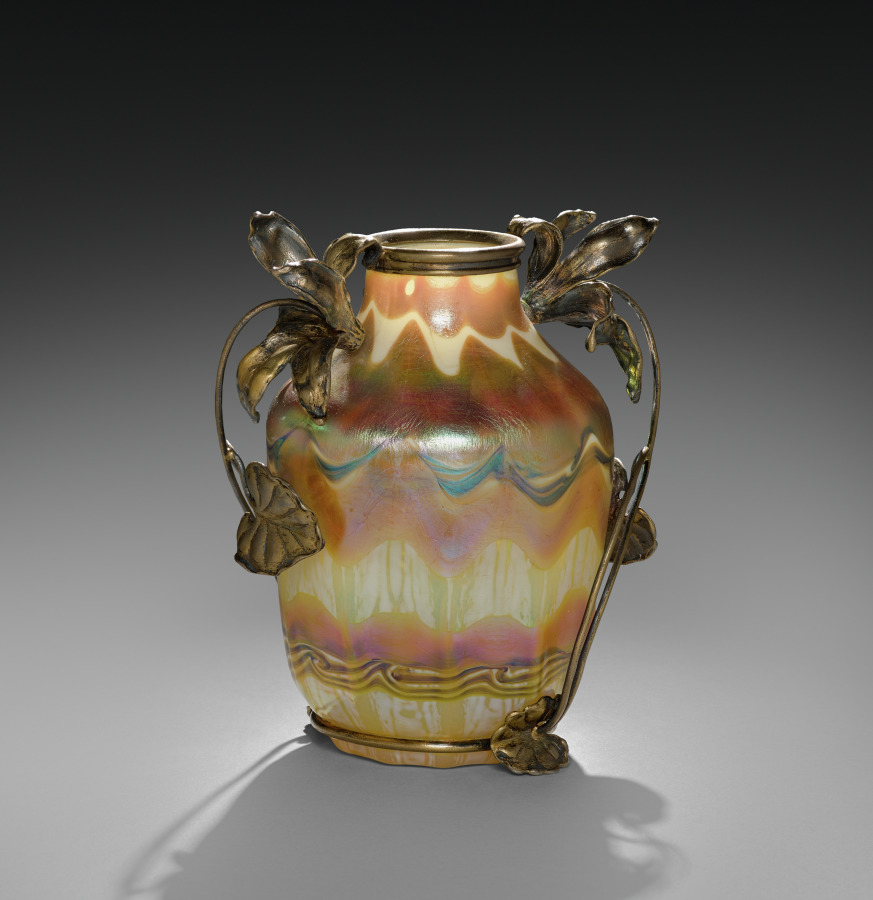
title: Vase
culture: America, New York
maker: Tiffany Glass & Decorating Company (America, New York, 1892–1902)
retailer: Siegfried Bing (German, active in France, 1838–1905)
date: c. 1900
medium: Favrile glass, silver mount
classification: Glass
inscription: Louis C. Tiffany o10301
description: This small vase is made of Louis Comfort Tiffany's signature Favrile glass. Early on when Tiffany began collaborating with glass artists on new types of production, his aesthetic ambitions were realized in the development of Favrile glass, deliberately named to sound French, expensive, and “handmade.” Largely through Tiffany's marketing ability, Favrile glass became America’s greatest contribution to the Art Nouveau style. His works were exhibited at international expositions; galleries in major European cities, where his creations were bought by many museums; and in his store in Manhattan, known as the Tiffany Glass and Decorating Co., later Tiffany Studios. Along with the many shapes and sizes of his decorative vases, Tiffany used Favrile glass in mosaic panels, stained glass windows, and his artistic line of table and floor lamps.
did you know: This vase has French mounts indicating that it was likely sold by Louis Comfort Tiffany's agent in Paris, Siegfried Bing, who helped popularize Tiffany's designs throughout Europe.